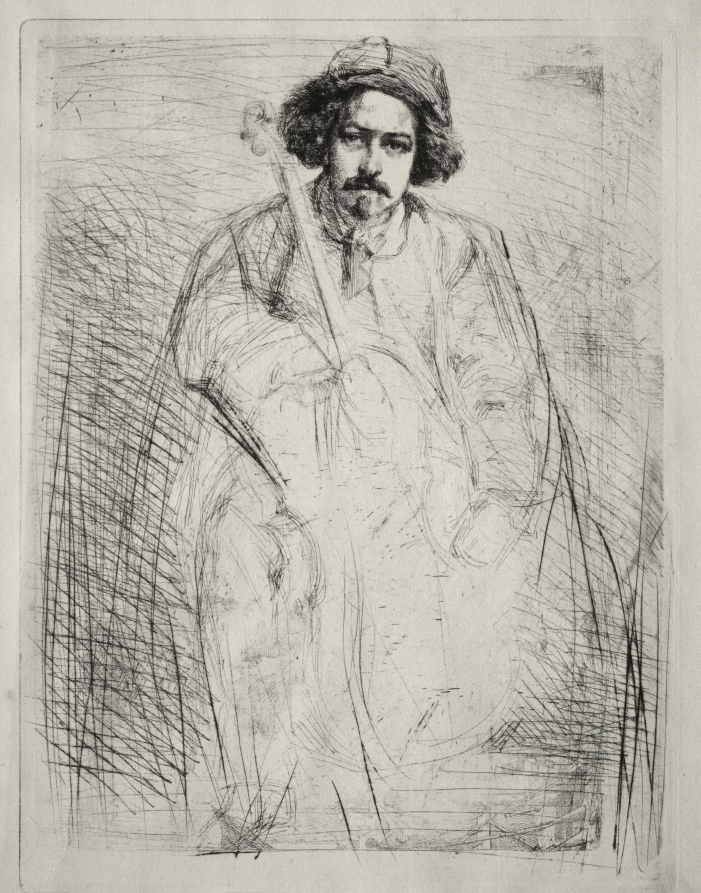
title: Becquet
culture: America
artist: James McNeill Whistler (American, 1834–1903)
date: 1871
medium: etching and drypoint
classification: Print